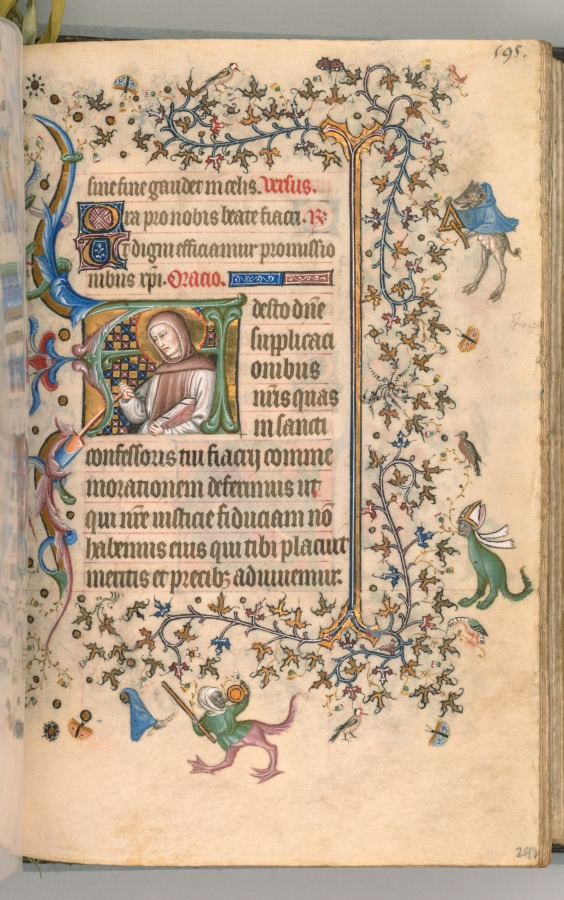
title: Hours of Charles the Noble, King of Navarre (1361-1425): fol. 292r, St. Fiacre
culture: France, Paris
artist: Master of the Brussels Initials and Associates (French)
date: c. 1405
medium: ink, tempera, and gold on vellum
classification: Bound Volume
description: This precious volume was obviously highly prized by its owner, the French-born King of Navarre, who had his coat of arms painted on no less than twenty folios. Rather than directly commissioning this manuscript from a specific workshop, it seems that Charles the Noble acquired his book of hours -- perhaps ready-made for the luxury market -- while on a trip to Paris in 1404-05. A collaborative effort, six painting styles are evidenced within the pages of this codex, those of two Italians, two Frenchmen, and two Netherlanders. The painter who was responsible for the planning and decoration of the book, and who produced seventeen of the large miniatures, was a Bolognese artist known as the Master of the Brussels Initials. His principal assistant, responsible for most of the borders, was a Florentine who signed his name "Zecho" da Firenze on folio 208 verso.